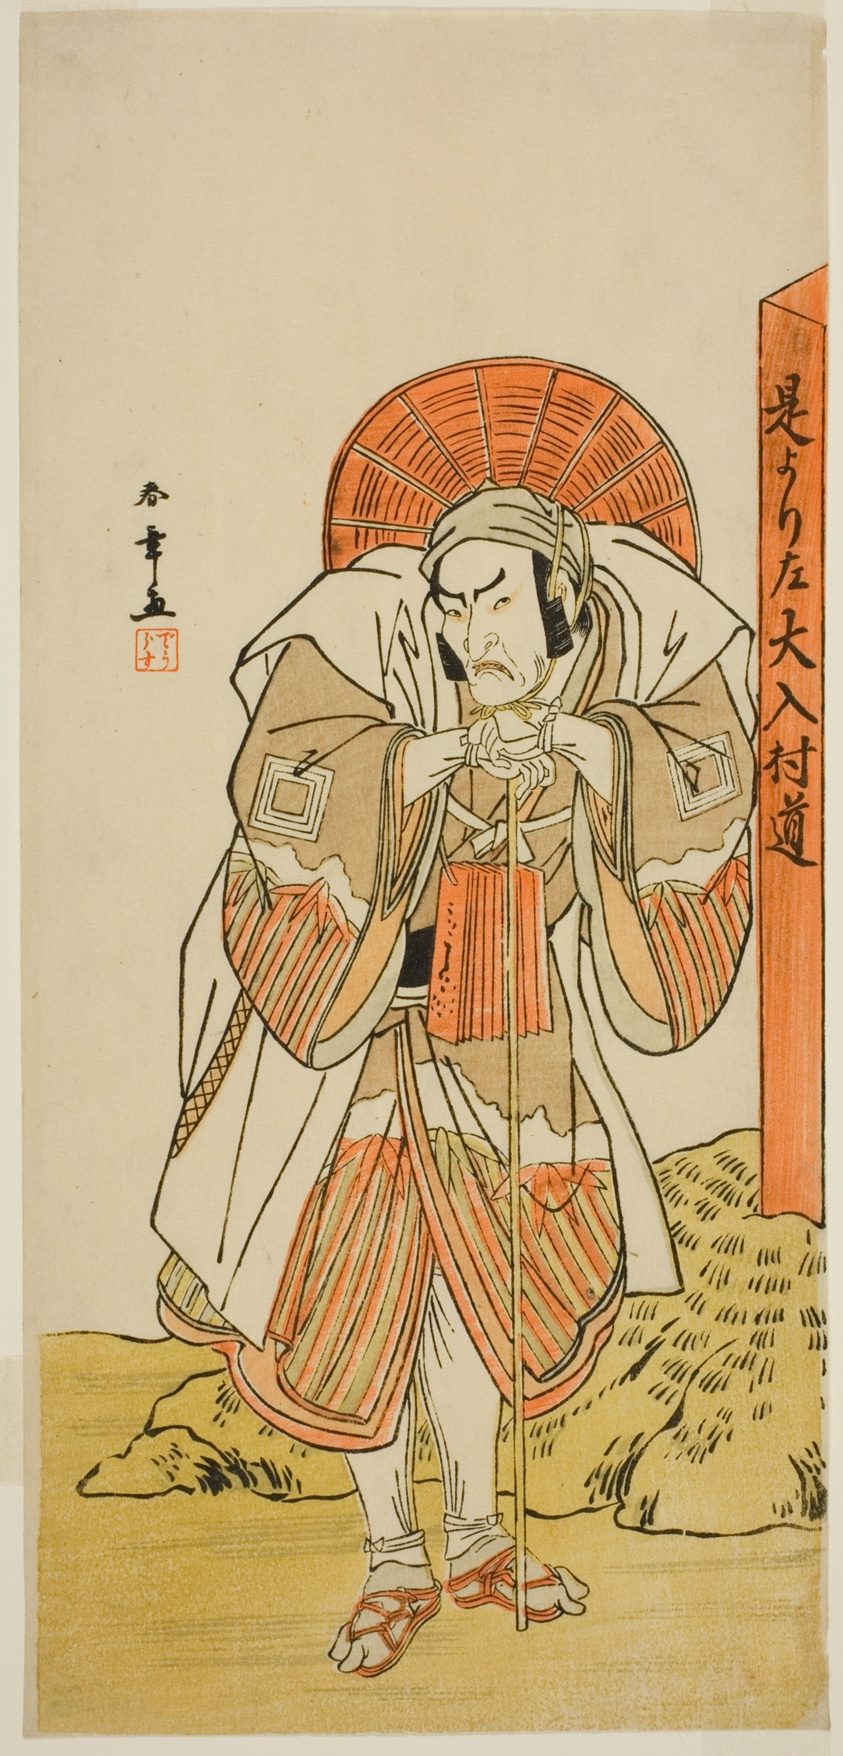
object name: Print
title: The Actor Ichikawa Danzo IV as Kunii Kurando in the Play Date Nishiki Tsui no Yumitori, Performed at te Morita Theater in the Eleventh Month, 1778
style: Japanese (culture or style)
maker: Katsukawa Shunsho 勝川 春章; Japanese, 1726-1792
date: c. 1778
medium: Color woodblock print; hosoban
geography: Japan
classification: woodblock print; print; asian art